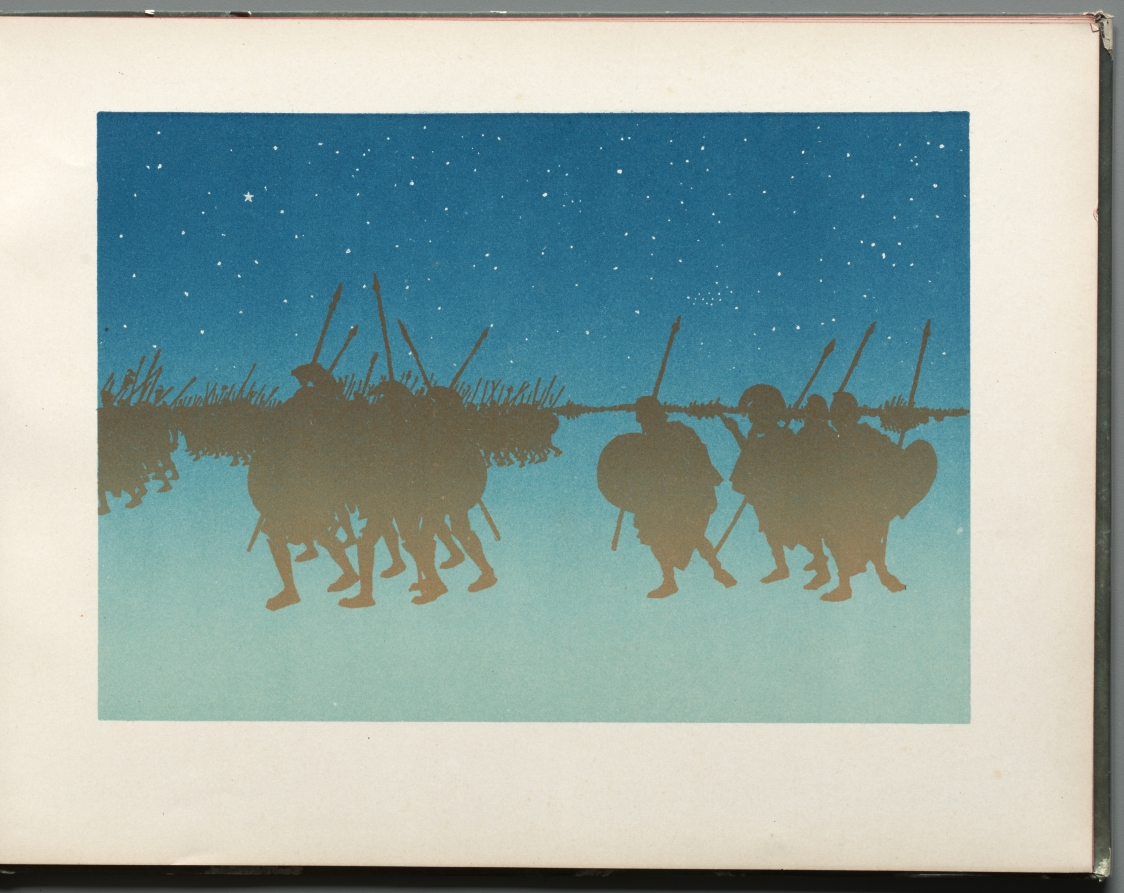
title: The Progress of the Stars: Les Soldats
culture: France, 19th century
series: Bound Volume illustrating the poetry and music of Georges Fragerolle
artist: Henri Rivière (French, 1864–1951)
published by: C. Marpon & Flammarion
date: 1890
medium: 18 color lithographs in a Bound Volume illustrating the poetry and music of Georges Fragerolle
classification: Bound Volume